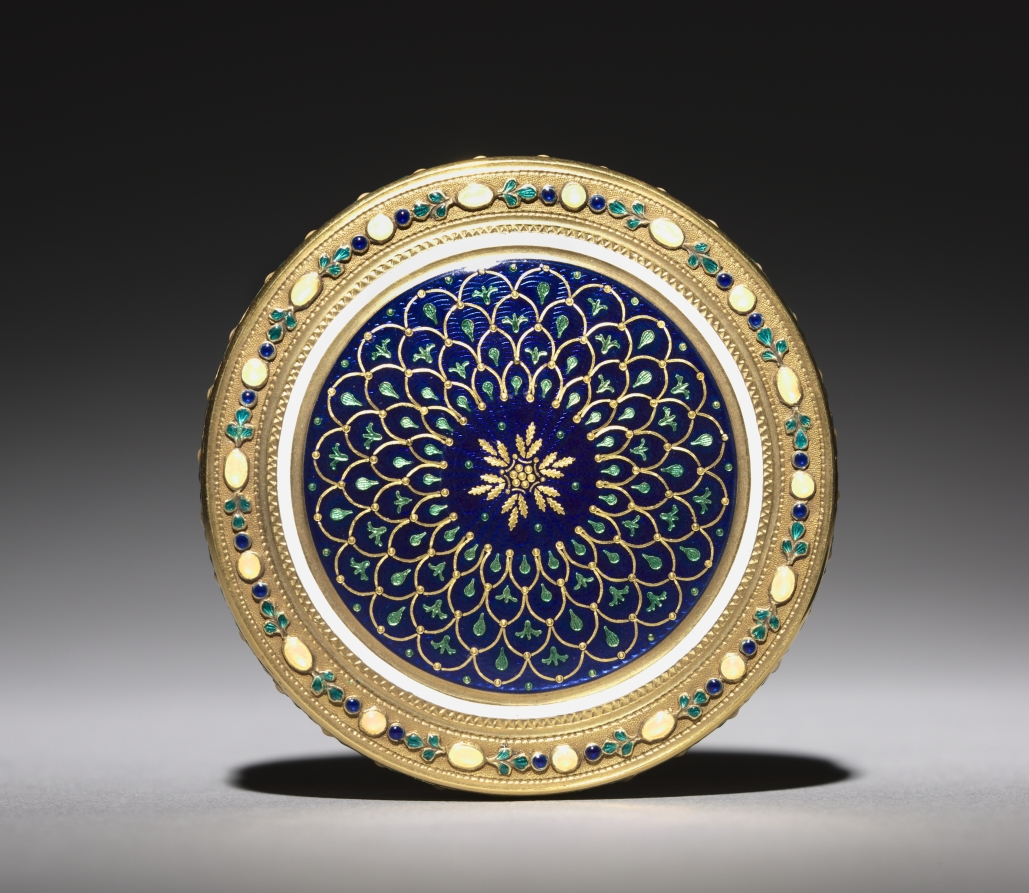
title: Powder Box (Poudrier)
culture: France, 18th century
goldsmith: Jean-Joseph Barrière (French)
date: 1779–80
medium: enamel on gold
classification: Miscellaneous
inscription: [Maker's mark of Jean-Joseph Barrière, master goldsmith in 1763, bottom; exterior wall; inside cover]: "JJB"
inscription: [Warden's mark for Paris, 1779-1780, exterior wall]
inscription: [Discharge mark of Henry Clavel I, Paris, 1780-1782, exterior wall]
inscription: [Counter-mark of Henry Clavel I and Jean-Francois Kalendrin, Paris,1782-1789, exterior wall]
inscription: [Restricted warranty mark for gold, Paris, exterior wall]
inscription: [Three illegible marks, bottom]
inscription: [Three illegible marks, cover]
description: In the 1700s ornately enameled boxes became a popular accessory in the French court. These boxes often held powdered tobacco, called snuff. However, this box, which is unhinged, likely held powder, rouge, or face cream. Pageantry and performance were important aspects of social interaction during this period. The extravagant designs and associated functions of these boxes communicated social and political status.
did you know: Jean-Joseph Barrière received his designation of master goldsmith in 1763, a coveted title that required candidates to complete a lengthy apprenticeship followed by a test of skill.